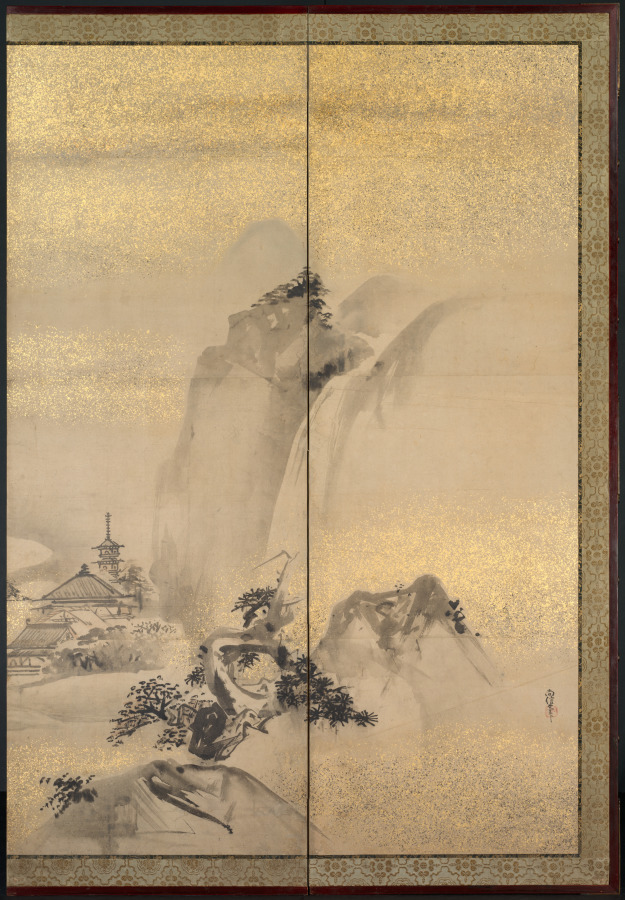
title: Summer and Winter Landscapes (one of a pair)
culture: Japan, Edo period (1615–1868)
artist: Kano Naonobu (Japanese, 1607–1650)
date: 1600s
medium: six-panel folding screen; ink on gold- and silver-decorated paper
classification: Painting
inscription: signed: "Jitekisai Naonobu"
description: This sparse composition depicts a summer scene on the right and a winter scene on the left. Careful observation reveals that the pair of screens was once damaged, and a later conservation including new sections of paper and inpainting sought to preserve the original flavor of the paintings so they could continue to be appreciated. Kano Naonobu was born in Kyoto, the younger brother of major painter and authenticator Kano Tan’yū (1602–1674). He relocated to Edo (present-day Tokyo) at the behest of the Tokugawa government in 1630 where he worked with his brother and teacher. In Kyoto, he helped his brother with paintings for Nijō Castle and the major Pure Land Buddhist temple Chion’in.